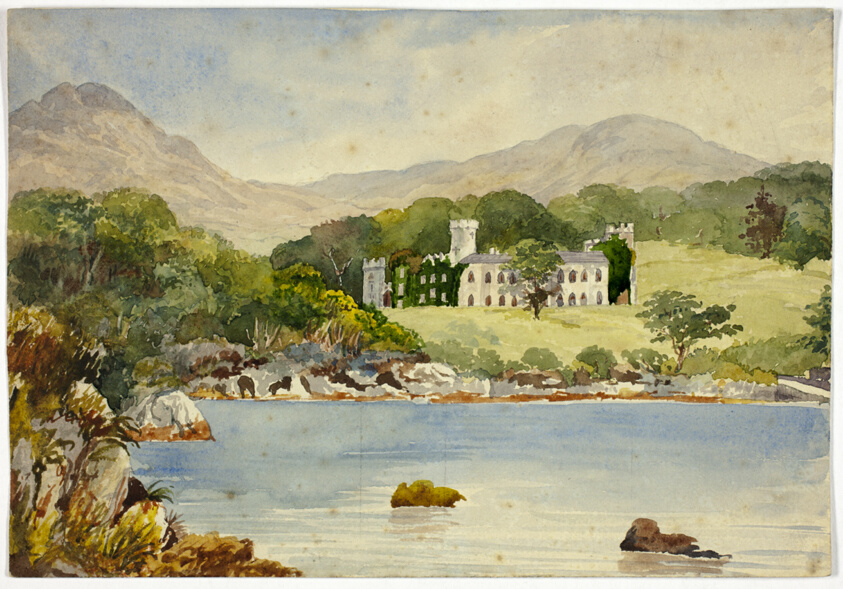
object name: Drawing and Watercolor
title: Leitch Castle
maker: Style of William Leighton Leitch (Scottish, 1804-1883)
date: 1840/50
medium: Watercolor, over traces of graphite, with varnish, on cream wove paper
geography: Scotland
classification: watercolor; drawings (visual works); prints and drawing